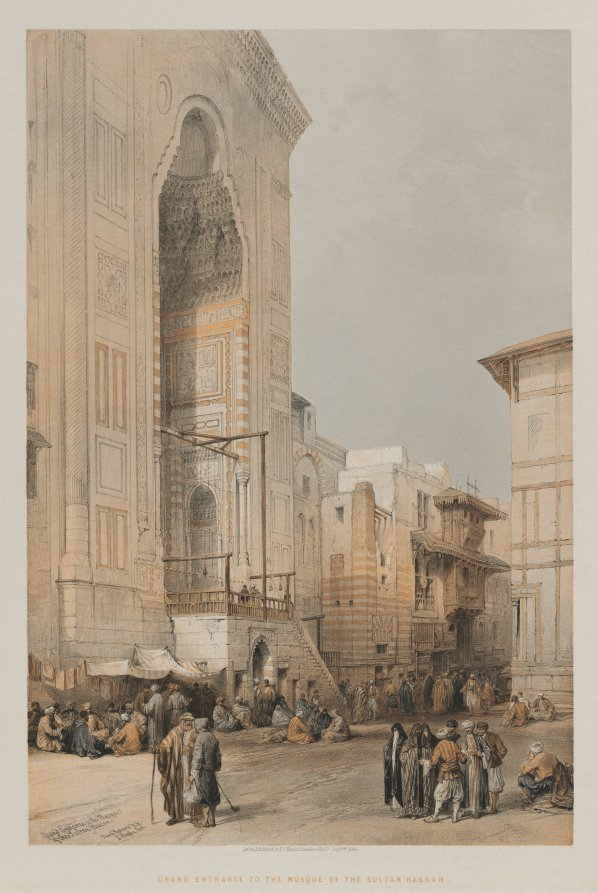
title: Egypt and Nubia, Volume III: Grand Entrance to the Mosque of the Sultan Hassan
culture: England, 19th century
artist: Louis Haghe (British, 1806–1885)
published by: F. G. Moon, 20 Threadneedle Street, London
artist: after David Roberts (Scottish, 1796–1864)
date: 1849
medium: color lithograph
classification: Print